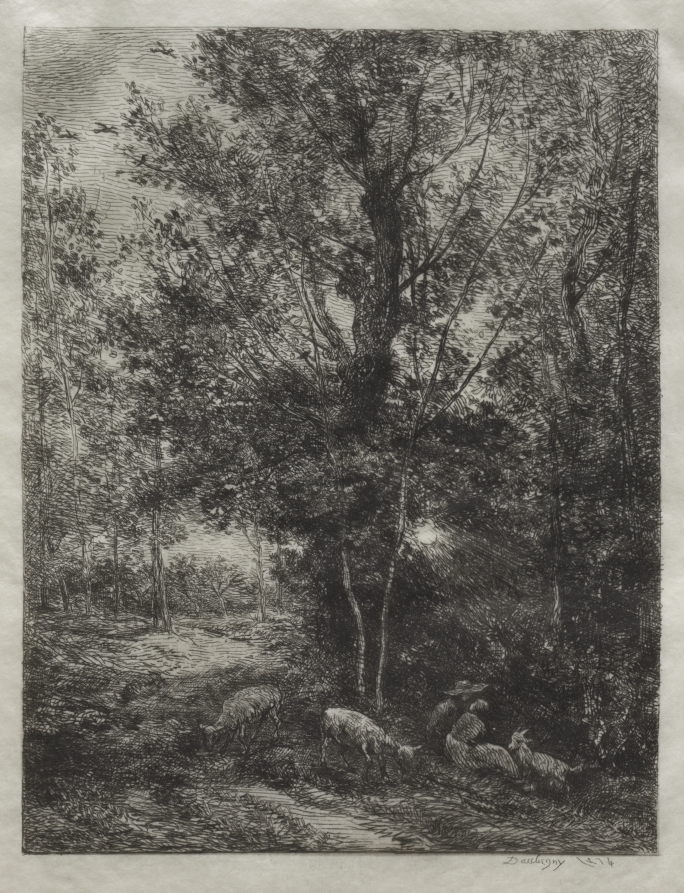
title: The Shepherd and the Shepherdess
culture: France, 19th century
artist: Charles François Daubigny (French, 1817–1878)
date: 1874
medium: etching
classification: Print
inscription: signed, lower right, in plate: Daubigny 1874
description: Although etching had fallen into disfavor in France, Daubigny began to produce original etchings in the 1840s. The revival of this technique began to accelerate, and in 1862 the Société des Aquafortistes (Society of Etchers) was organized by Alfred Cadart, who was instrumental in publishing many albums of prints. In addition, periodicals such as L'Artiste (The Artist) included original etchings, which also helped to generate interest in the medium. The countryside around Barbizon (a village about 30 miles southeast of Paris) provided a refuge from the urbanization and industrialization of modern life and offered landscape etchers a vast array of scenery—from wild forest to rocky gorges. Daubigny, who wanted to retain the immediacy of the direct observation of nature, used a flat-bottomed boat as a floating studio on the rivers of France in order to capture the momentary effects of light and atmosphere.